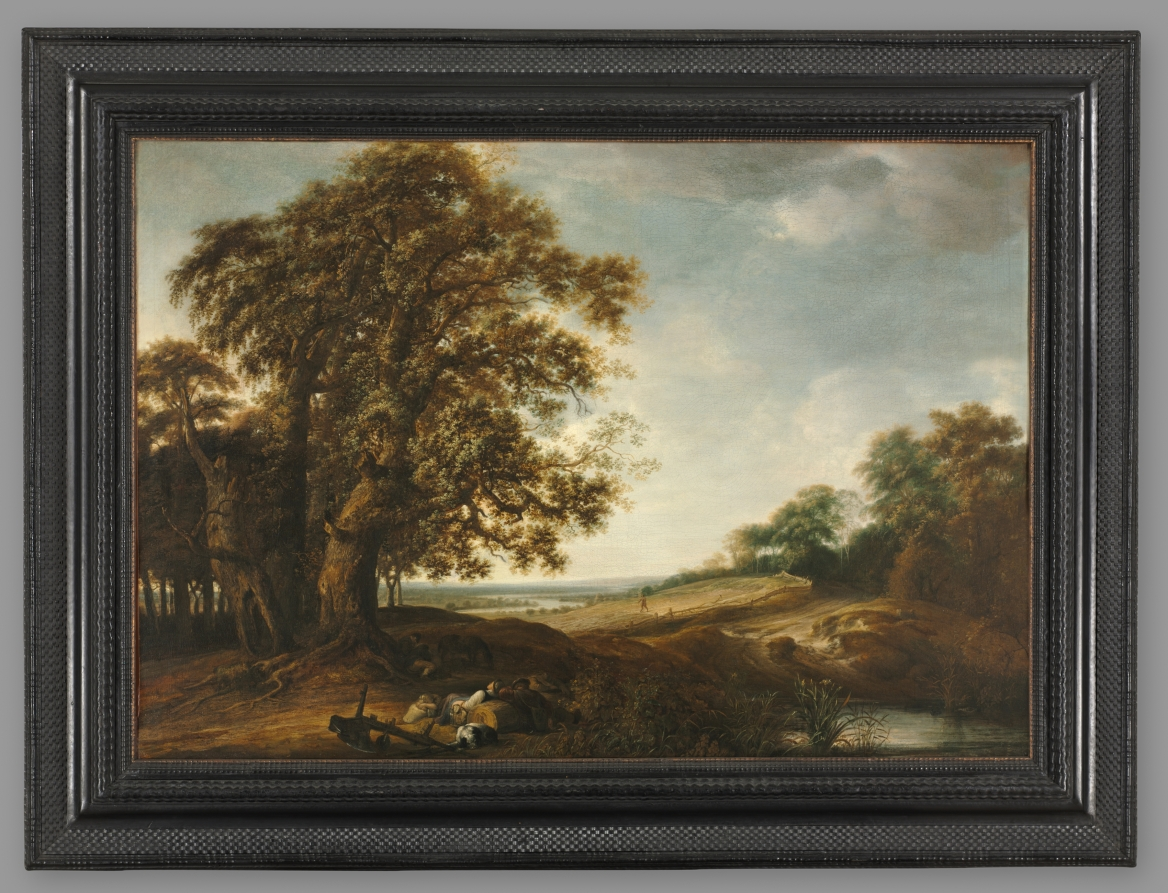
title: Sleeping Peasants near Fields (Parable of the Weeds)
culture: Netherlands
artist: Simon de Vlieger (Dutch, 1601–1653)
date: 1650–53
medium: oil on canvas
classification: Painting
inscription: Signed lower left: S. DE VLIEGER 16[5...]"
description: During the 1600s Protestant leaders denounced visual representations, in a belief that a strict understanding of the scriptures was the only way to achieve salvation. As a result, Protestants did not generally commission religious images. However, where religious painting did appear, they often depicted verses from the Bible with strict didactic values, such as Sleeping Peasants near Fields (Parable of the Weeds). The subject of this painting is the Parable of the Weeds from Matthew 13:24-30. Simon de Vlieger has illustrated the point in the story where the peasants sleep after sowing good seeds, and the enemy, depicted here as a satyr, mixes in bad seeds in the fields as well. When the weeds begin to grow, confused, the peasants ask the farmer if they should remove the seeds. The farmer replies that they should let the weeds and wheat grow together, and he will destroy the weeds after the harvest. The lesson of the story is that good and evil people often mix together; but in the end the pious will prevail and the wicked will be destroyed.